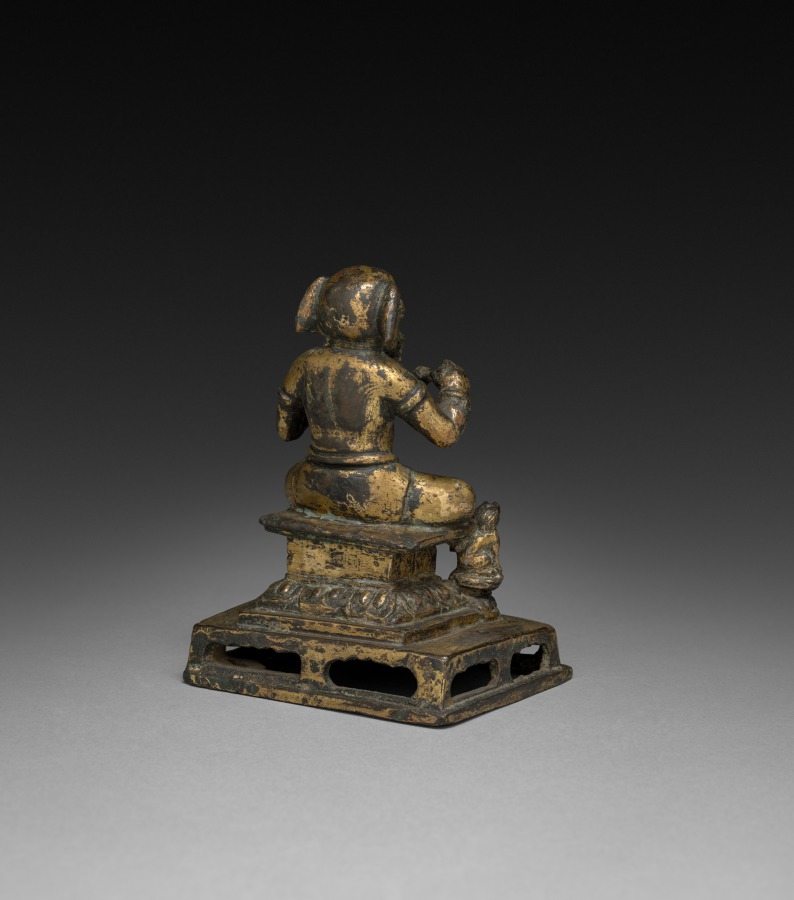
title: Ganesha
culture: China, Tang dynasty (618-907)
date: 618–907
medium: gilt bronze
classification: Sculpture